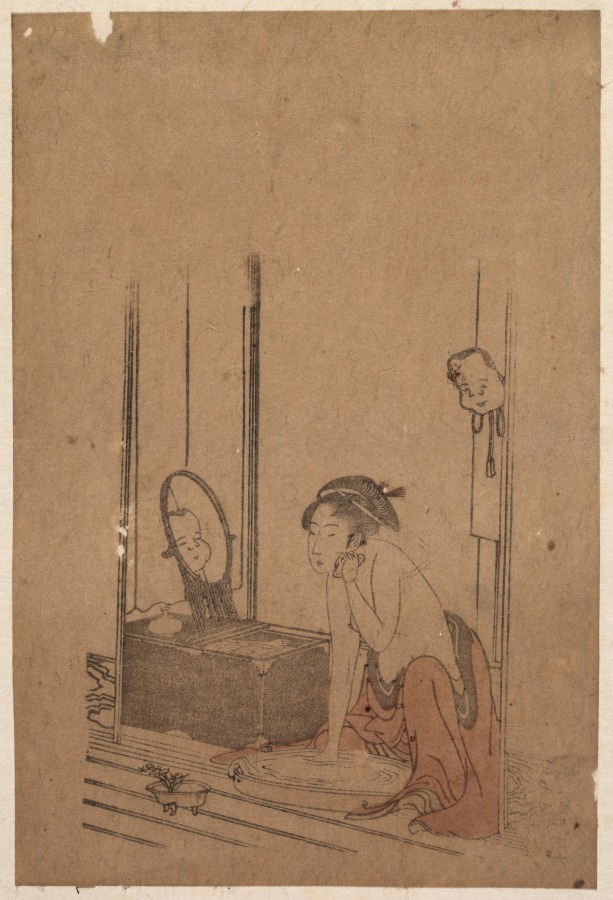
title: Woman Bathing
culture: Japan, Edo period (1615–1868)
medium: color woodblock print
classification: Print